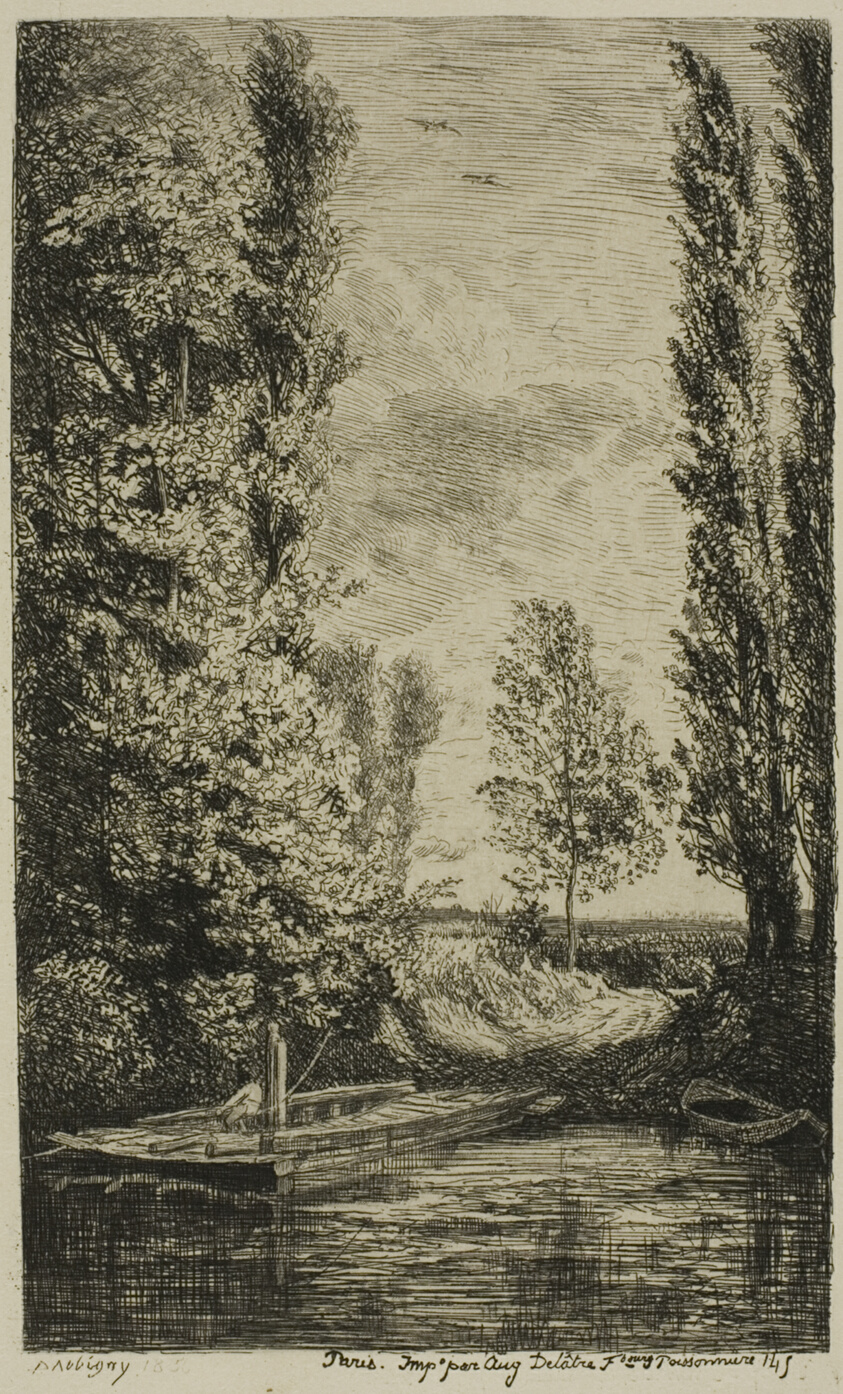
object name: Print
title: The Ferryboat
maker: Charles François Daubigny (French, 1817-1878)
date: 1850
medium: Etching and roulette on cream Japanese paper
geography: France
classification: etching; print; prints and drawing